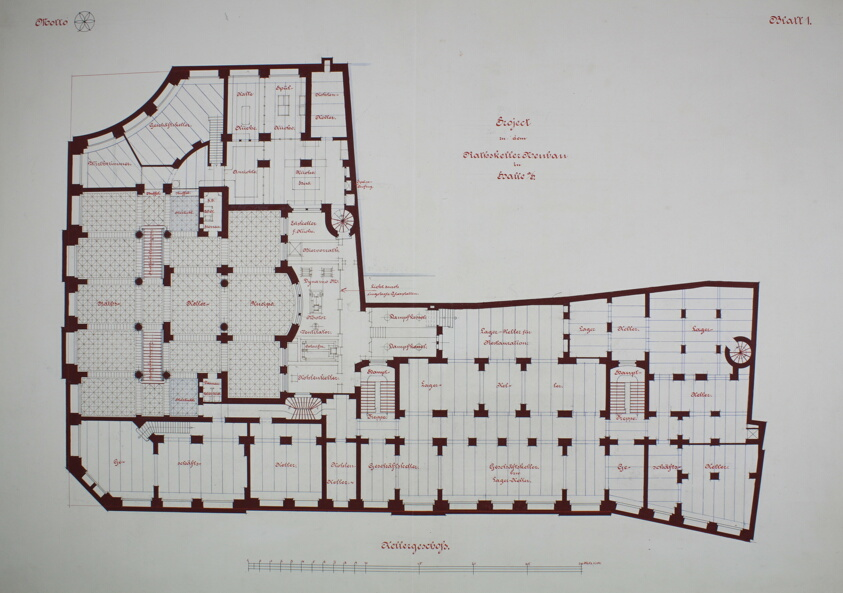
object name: Architectural Drawing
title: Rathskeller Neubau, Halle (Saale), Saxony-Anhalt, Germany, Basement Plan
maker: Peter J. Weber; American, born Germany, 1863-1923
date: c. 1887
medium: Graphite, ink, watercolor, and tempera on paper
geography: Saxony-Anhalt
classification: design drawing; architectural drawing